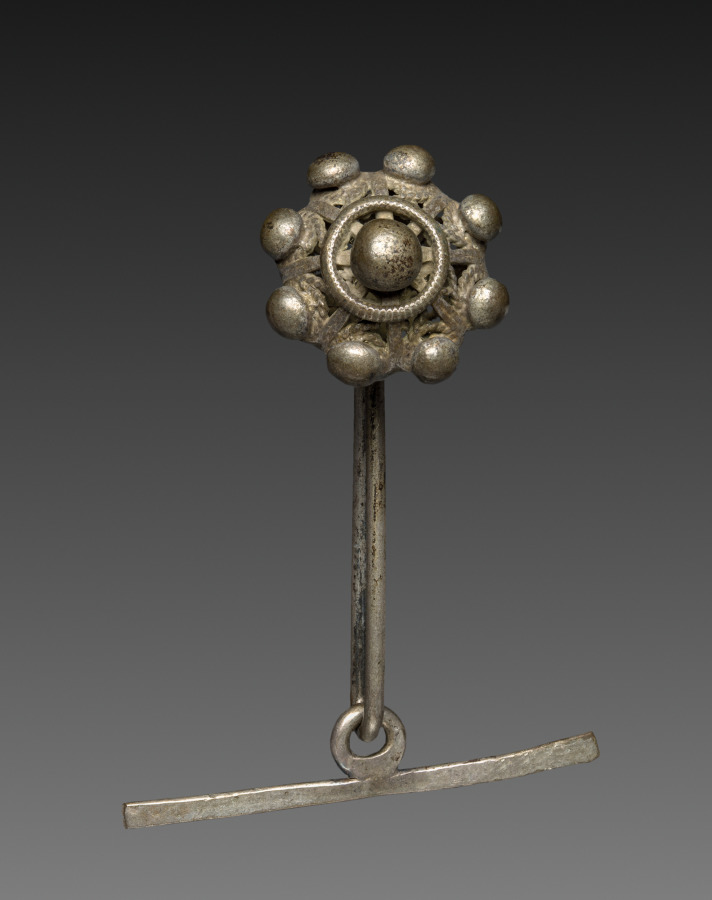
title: Button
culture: Italy, Sardinia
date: 1800s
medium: silver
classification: Jewelry